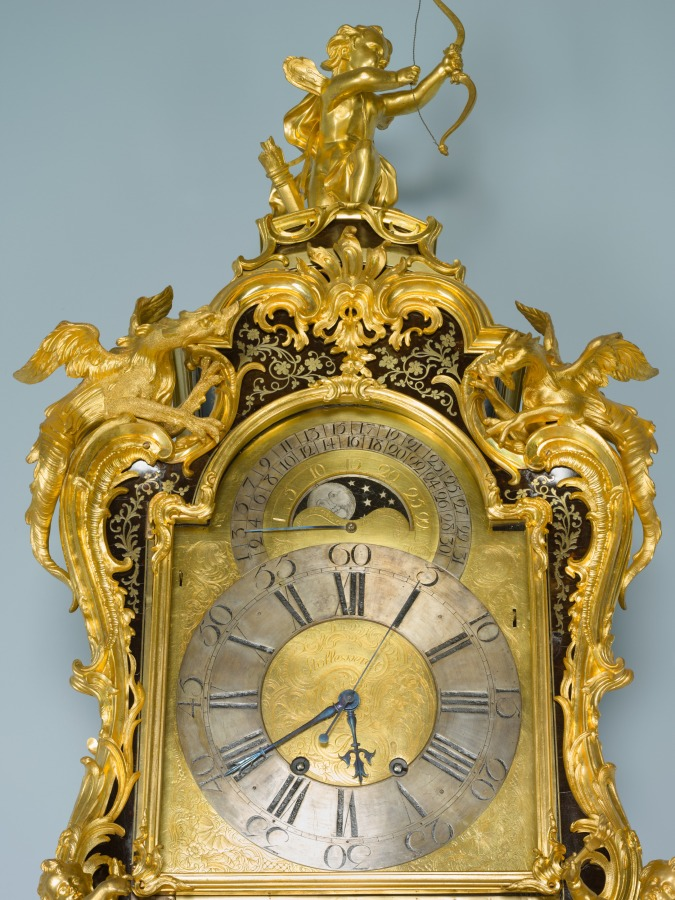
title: Tall- case Clock (Regulateur)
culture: France, Paris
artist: Jean-Pierre Latz (French, 1691–1754)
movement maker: Stollewerck (French)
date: 1744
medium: boulle marquetry with gilt bronze mounts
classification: Furniture and woodwork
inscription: incised on the back of the lowest front panel: .LATZ . A . PARISIIS . FECIT ./. MDCCXLIV; engraved on the clock face: Stollewerck/Paris.